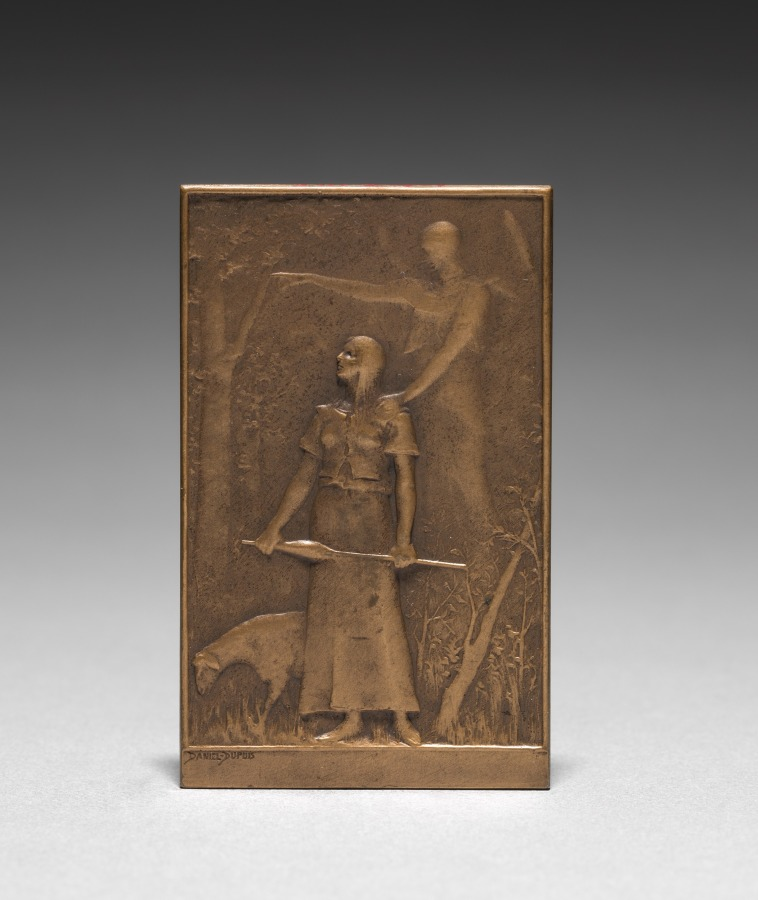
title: Medallion: Jeanne d'Arc (obverse)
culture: France, 19th century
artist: Daniel Dupuis (French, 1819–1899)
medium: bronze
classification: Metalwork